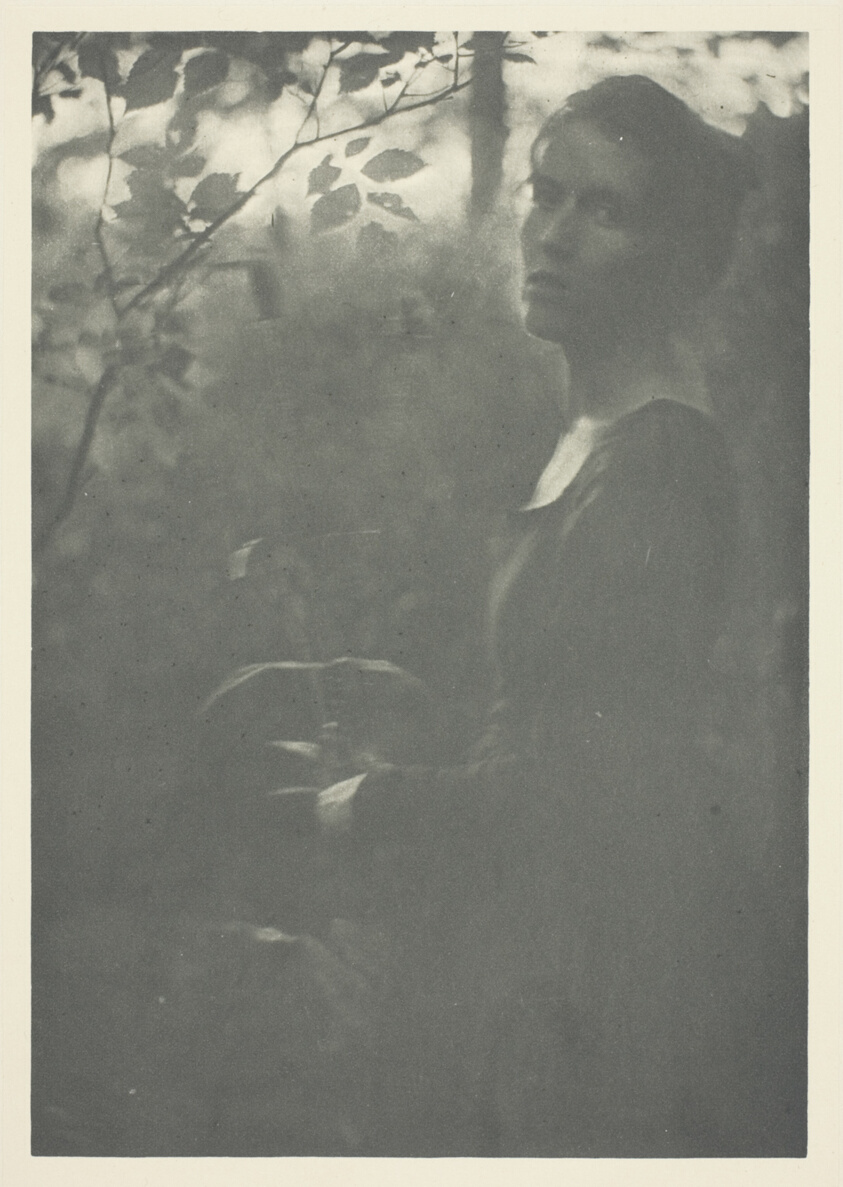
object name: Photograph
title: Edge of Woods, No. 10 from the portfolio "American Pictorial Photography, Series II” (1901); edition 34/150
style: Pictorialism, 19th century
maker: Clarence H. White (American, 1871–1925)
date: c. 1899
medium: Photogravure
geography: United States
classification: photogravure; photomechanical process; photography; photograph